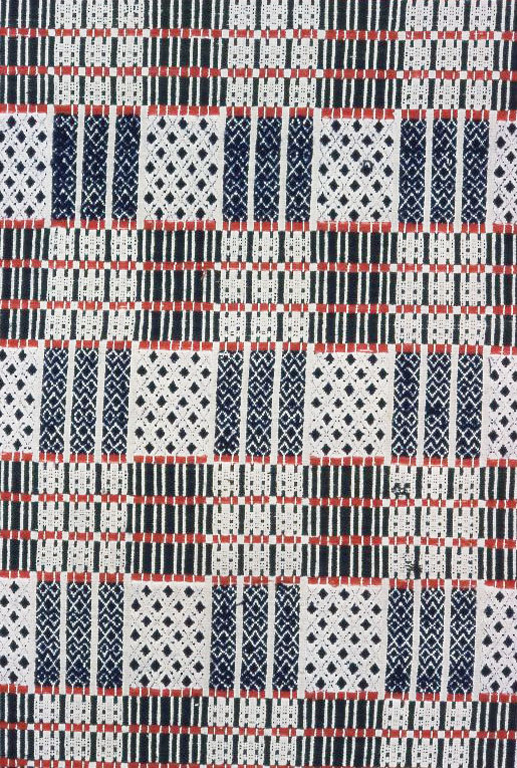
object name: Textile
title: Coverlet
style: 19th century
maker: United States, Pennsylvania, Bucks County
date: 1825/35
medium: Cotton and wool, plain weave with supplementary patterning wefts (overshot); knotted main warp fringe; woven on loom with Jacquard attachment; two loom widths joined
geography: Bucks County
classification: weaving - coverlet; coverlet; textile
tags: geometric motif, rectangles, diamond shapes, lines, grids, squares, geometric, coverlet